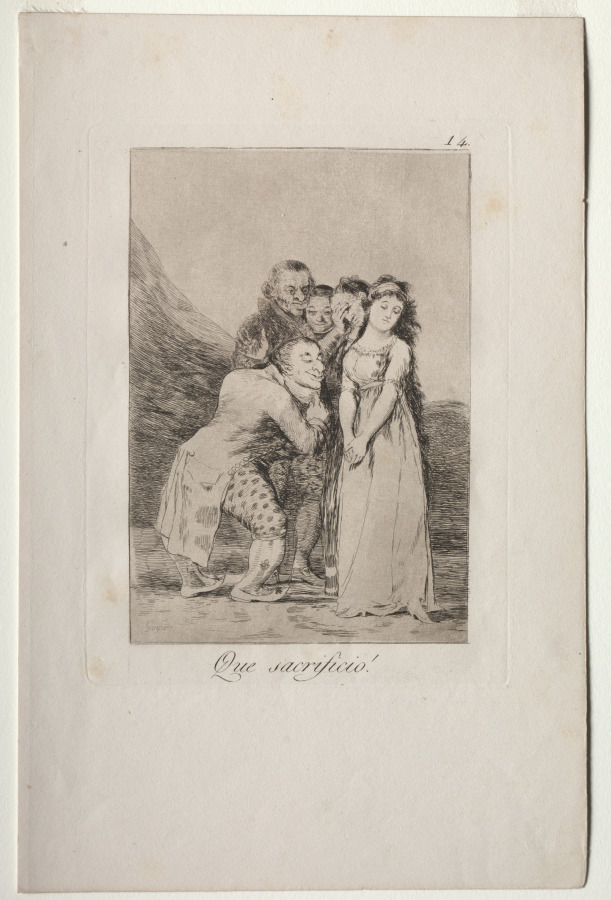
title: What a Sacrifice!, Plate 14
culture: Spain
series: Los Caprichos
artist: Francisco de Goya (Spanish, 1746–1828)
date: 1799, printed c. 1855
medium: etching and aquatint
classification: Print